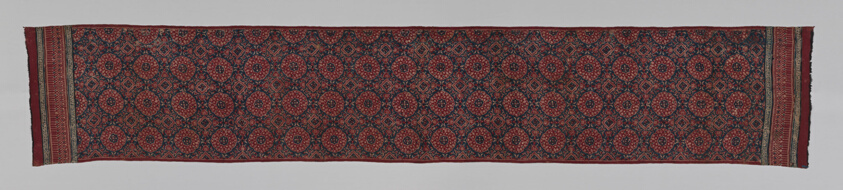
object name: Textile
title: Heirloom Textile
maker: India, Gujarat; Found in the Toraja area of Sulawesi, Indonesia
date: Early 17th/early 18th century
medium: Cotton, plain weave; resist-dyed; both selvages present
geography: India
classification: textile; weaving - printed; weaving